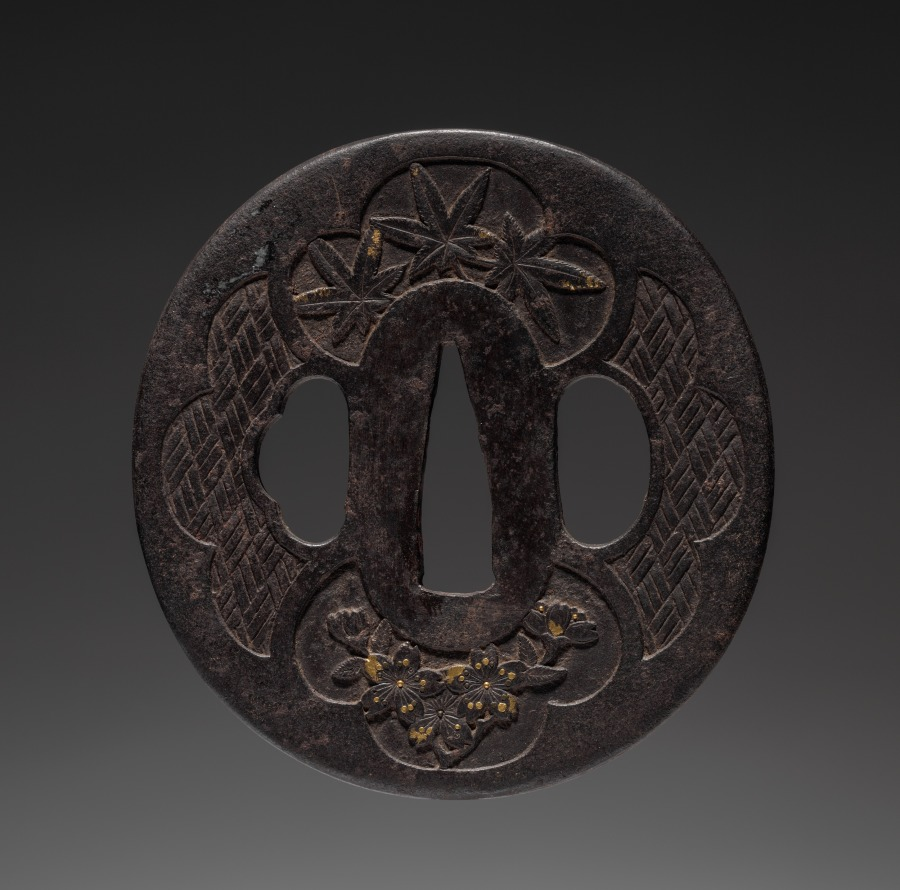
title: Sword Guard (Tsuba)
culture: Japan, Edo period (1615–1868)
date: mid-1800s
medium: iron (Ito type)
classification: Arms and Armor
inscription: signed "Masaharu, residing in Musashi province."